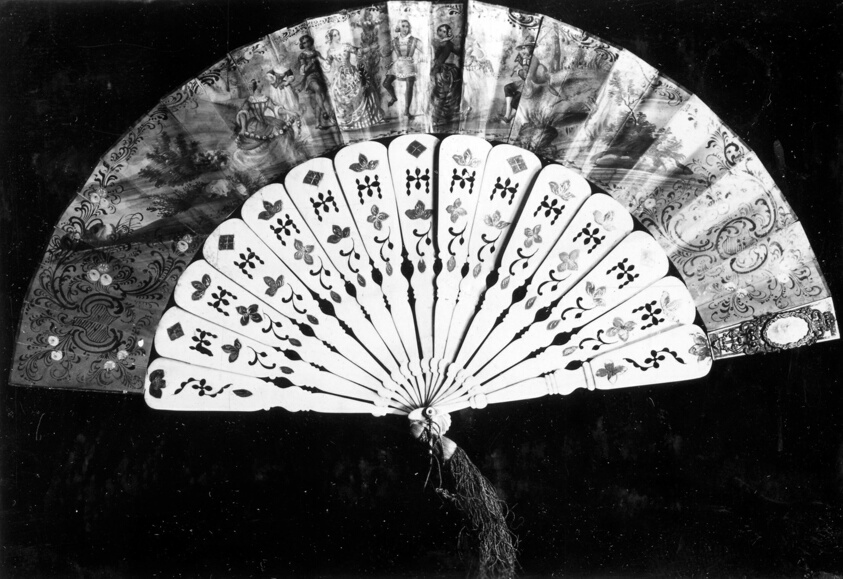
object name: Costume and Accessories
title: Fan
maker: France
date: 19th century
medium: Pierced and silver decorated bone sticks and guards; painted paper mount; mirror on guard; pearl rivet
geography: France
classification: textile; fan - paper; costume accessory - folding fan; costume